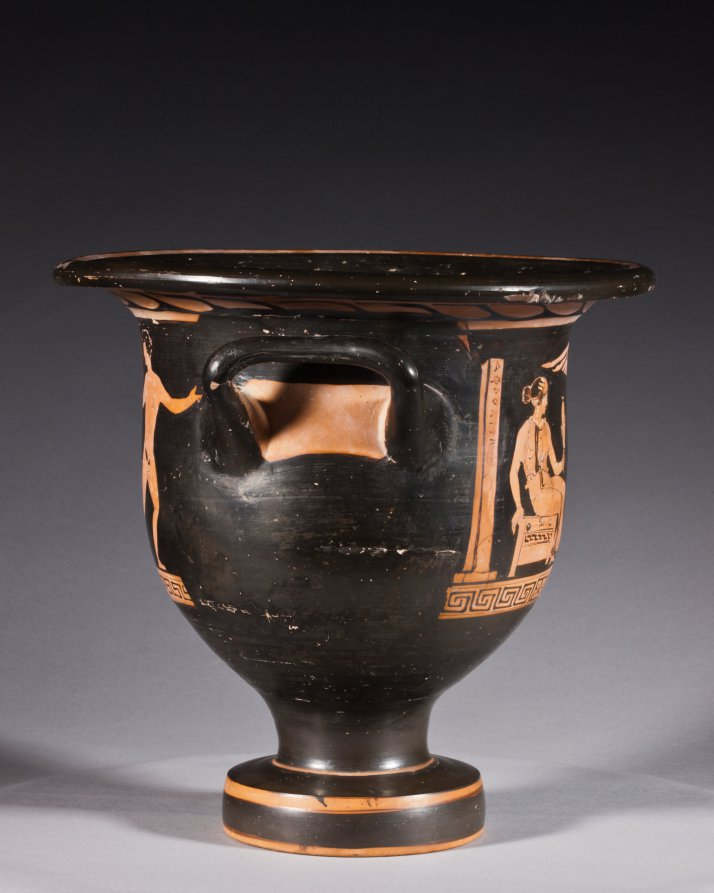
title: Red-Figure Bell Krater (Mixing Vessel): Aphrodite and Eros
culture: South Italian, Apulian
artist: attributed to Graz Painter (South Italian, Apulian, active c. 380–360 BCE)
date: c. 370–360 BCE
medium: ceramic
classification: Ceramic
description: This small mixing vessel shows a finely dressed woman seated on a chest and holding up a mirror to admire herself. Before her stands Eros, the winged god of love, holding a ribbon or sash. Behind the woman stands a pillar with the inscription ΑΦΡΟΔΙΤΗ, or APHRODITE, the goddess of love. Such labels are rare on vases, and scholars debate whether this names the woman shown as Aphrodite herself, with her son Eros, or a bride envisioning herself as Aphrodite, just before her wedding.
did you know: The dancing nude youths on the reverse are unusual; typically they would be standing and draped.